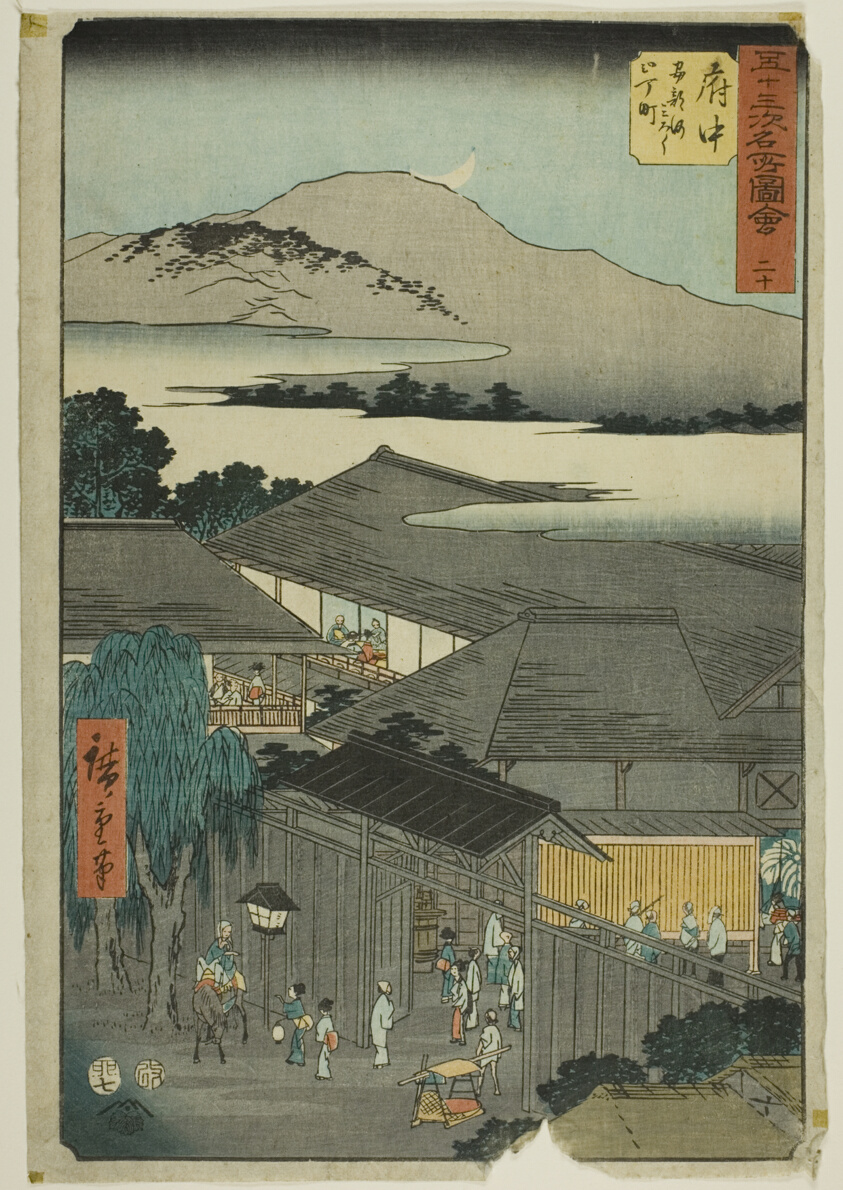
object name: Print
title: Fuchu: Miroku nichome, Abekawa (Fuchu, Abekawa Miroku nichome), no. 20 from the series "Famous Sights of the Fifty-three Stations (Gojusan tsugi meisho zue)," also known as the Vertical Tokaido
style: Japanese (culture or style)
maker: Utagawa Hiroshige 歌川 広重; Japanese, 1797-1858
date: 1855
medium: Color woodblock print; oban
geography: Japan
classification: woodblock print; print